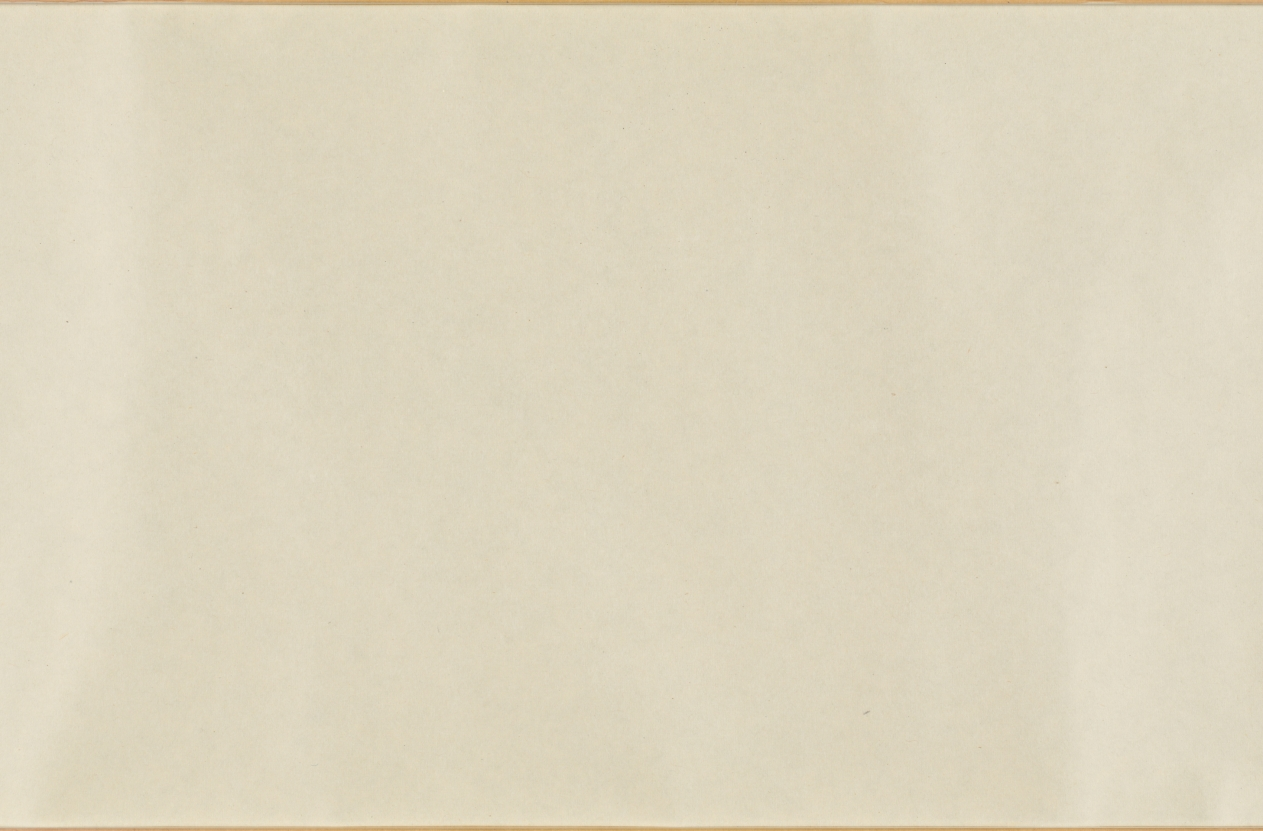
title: Selections from the New Collection of Japanese Poems from Ancient and Modern Times (Shinkokin wakashū) with Printed Designs of Chinese Lions and Crab Finger Grass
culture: Japan, Edo period (1615–1868)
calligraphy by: Hon'ami Kōetsu (Japanese, 1558–1637)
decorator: Tawaraya Sōtatsu (Japanese, c. 1570–c. 1640)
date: early 1600s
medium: handscroll; ink, gold, and silver on paper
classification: Calligraphy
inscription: Seal: 光悦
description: Hon’ami Kōetsu was a calligrapher and craftsman who frequently collaborated with the painter Tawaraya Sōtatsu, considered the first master of the Rinpa school. Kōetsu brushed seven poems from the autumn section of a poetry anthology onto dyed paper with motifs designed and printed in gold and silver by Sōtatsu.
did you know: Before becoming a master painter of screens, Tawaraya Sōtatsu painted fans.